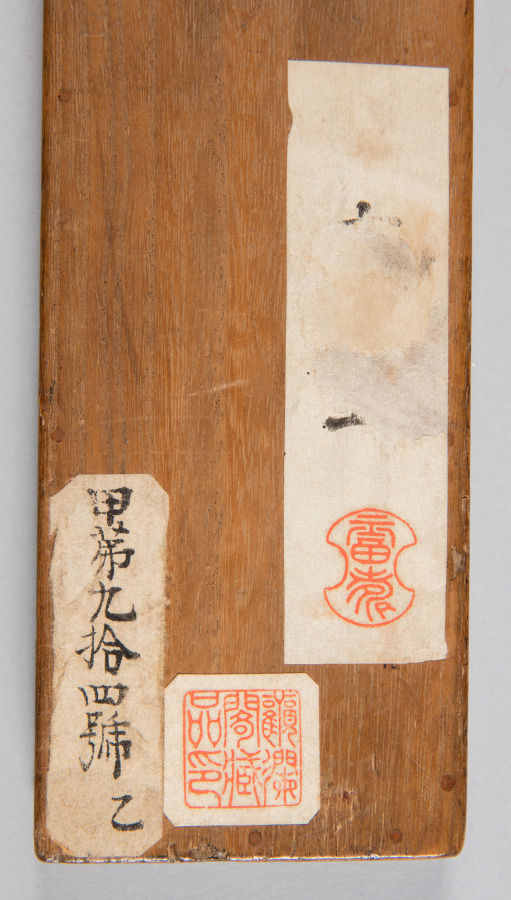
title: Reflections of Priest Foyen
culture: Japan, Muromachi period (1392–1573)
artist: Ikkyū Sōjun (Japanese, 1394–1481)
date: 1400s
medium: hanging scroll, ink on paper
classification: Painting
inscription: signed: "Kido nanasei son, Ikkyūshi Sōjun sho (Written by Ikkyū Sōjun, the seventh generation of Kido)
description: Left by his mother at a small Zen temple in Kyoto at the age of six, Ikkyu later drew on his early studies and experiences for his writings, which focused on his keen interest in the Chinese classics. Poetry in particular was a favorite subject and images from classical poetry or passages from favorite poems or commentaries frequently provided Ikkyu with the core ideas for his own work. A rare example of his calligraphy, this narrow scroll contains a verse in eight phrases, each comprising four characters. The whole verse is organized in three towering lines of brusque, emphatic calligraphy augmented by Ikkyu's signature-the two lines of running script in the lower left corner. The text refers to a passage included in the Chronicle of the Zen Sect that contains a cautionary reminder attributed to the legendary Chinese monk Foyen Qingyuan (1067-1120), long revered in Japan. The initial phrase begins: "Life is a mirage."